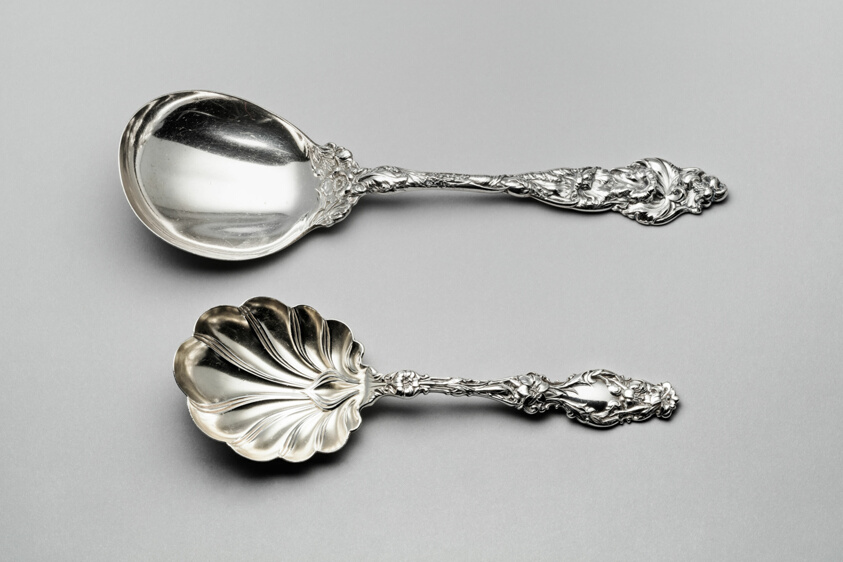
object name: Metalwork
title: Serving Spoon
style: 20th Century, Arts and Crafts Movement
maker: Reed and Barton (American, founded 1824); Taunton, Massachusetts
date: 1903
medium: Silver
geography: Taunton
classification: utensil for serving food; silver; utensil; spoon; american decorative arts; american arts; decorative arts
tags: spoon, flowers, eating